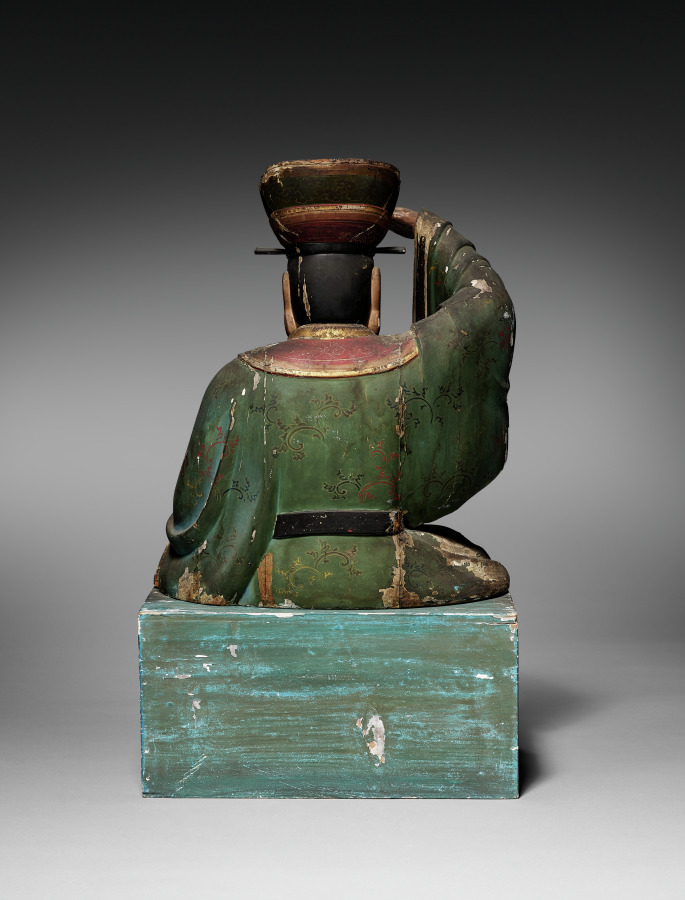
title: A King of Hell?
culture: Japan, Edo period (1615–1868)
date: c. 1800s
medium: wood, gesso, pigment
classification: Wood